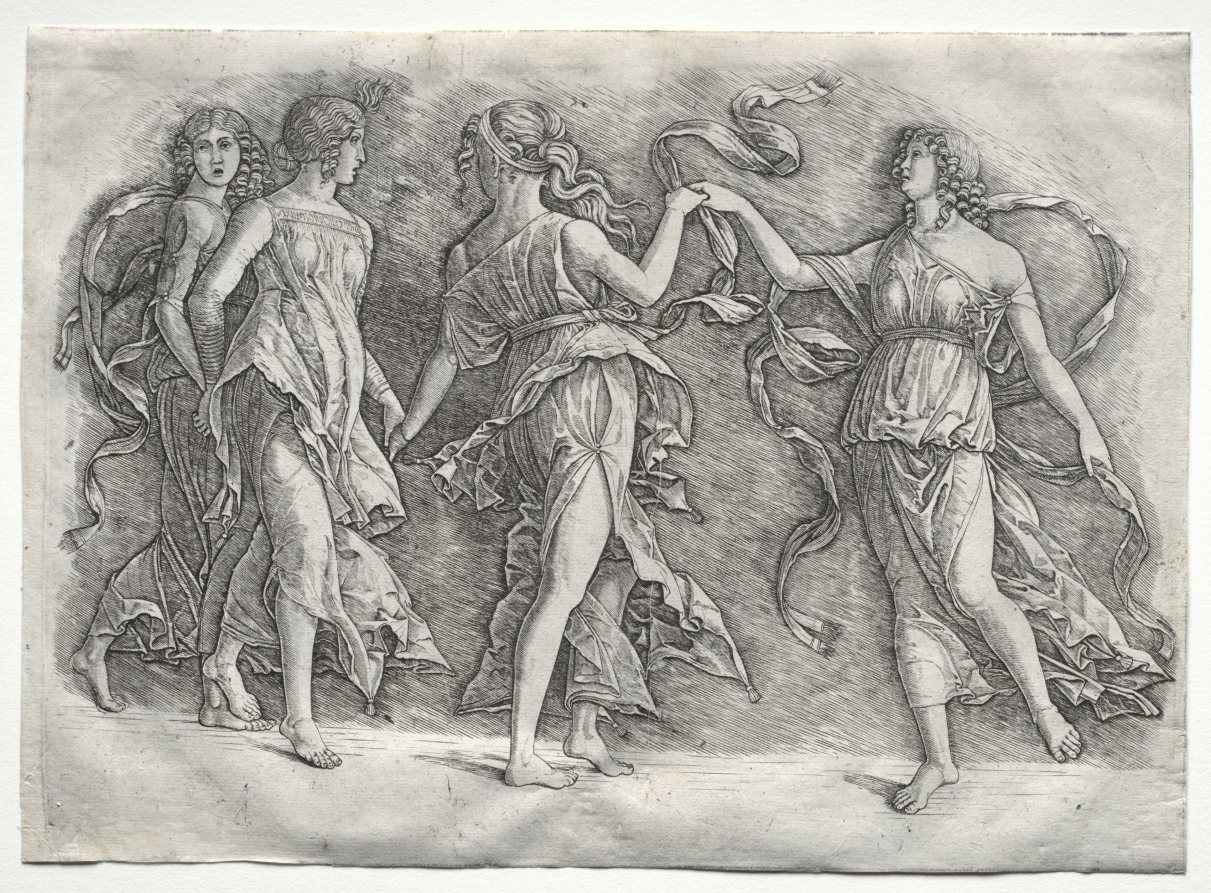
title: Four Dancing Muses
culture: Italy, 15th century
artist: probably by Premier Engraver (Italian, active about 1500)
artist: after Andrea Mantegna (Italian, about 1431–1506)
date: c. 1497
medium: engraving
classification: Print